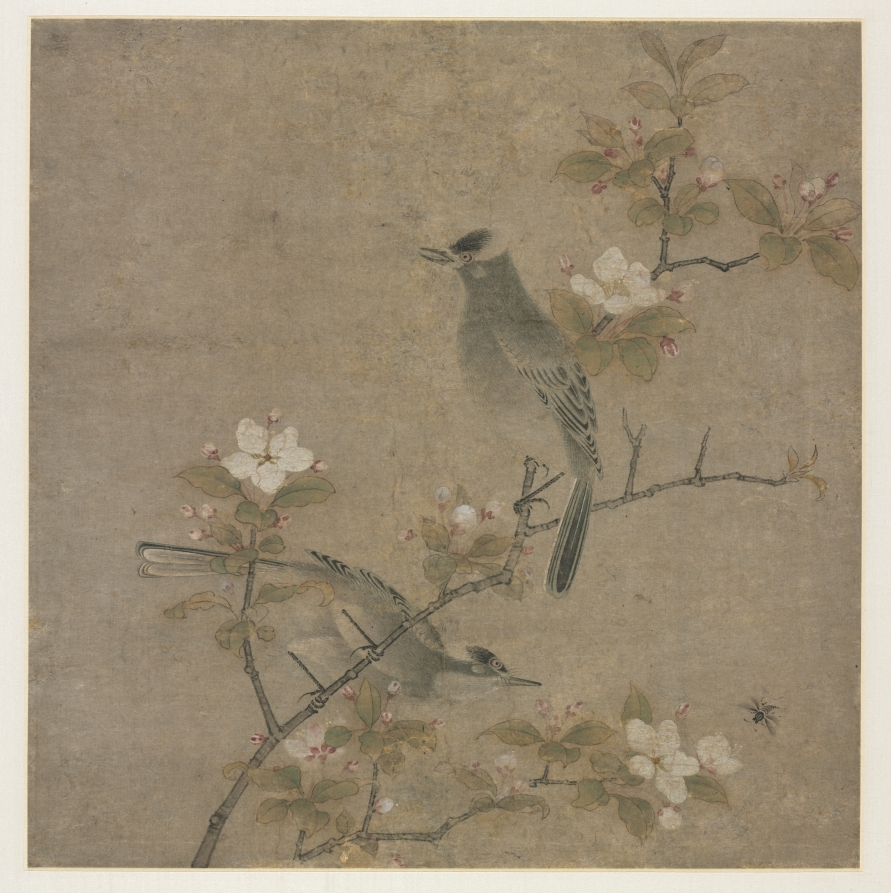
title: Flowers and Birds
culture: China, Yuan dynasty (1271-1368)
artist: style of Qian Xuan (Chinese, 1235–1307)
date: first half of the 14th Century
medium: Album leaf; ink and color on paper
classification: Painting